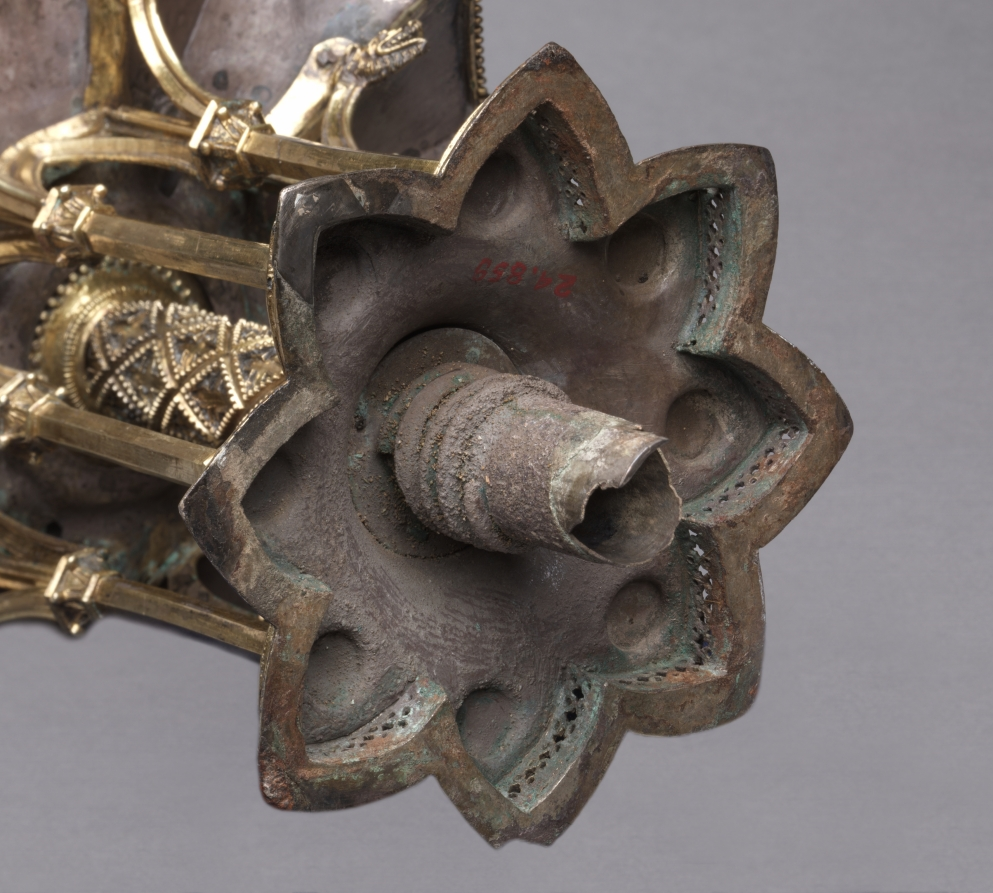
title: Table Fountain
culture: France, Paris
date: c. 1320–40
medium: gilt-silver and translucent enamels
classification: Metalwork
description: Conceptually and stylistically, this object is beyond all else a piece of Gothic architecture in miniature with vaults, pinnacles, columns, and traceried arches. Though the artist who created it is unknown, he was unquestionably inspired by the great Gothic buildings of his time. The table fountain is a three-tiered assembly combining cast elements with bent sheets of gilt-silver. To these have been attached a series of enamel plaques representing grotesque figures, some of which play musical instruments. Water wheels and bells were added to capture motion and sound. The rich detail, precious materials, and involved ornamentation of this deluxe object suggest it would have been expensive to produce and highly treasured by its original owner, someone of high status, and would have been deployed as an object of spectacle. This is the most complete example of its type known to survive from the Middle Ages. Medieval inventories reveal that small fountains like this, often taking various forms, and generally made from precious metals, once existed in large numbers, thus making the Cleveland table fountain an extremely rare object.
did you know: This fountain with its minute architectural details and finely made enamel plaques displayed the wealth and refinement of the owner as it entertained his guests. Imagine hearing the ringing of the tiny bells when this fountain was in use.